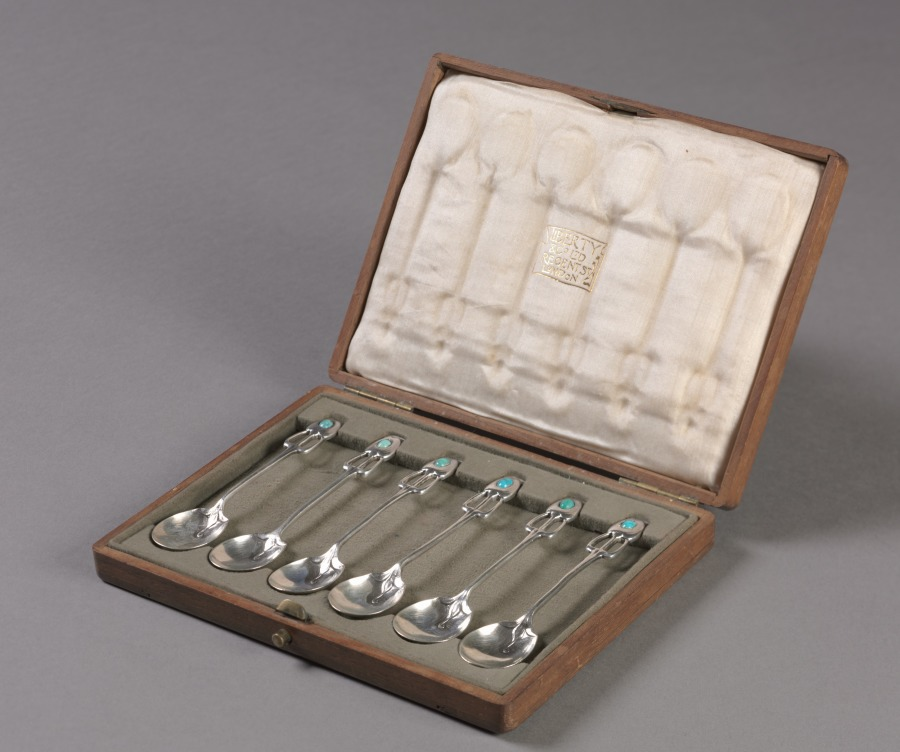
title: Set of six Coffee Spoons in Original Wooden Case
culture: England, London, 19th century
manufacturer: Liberty and Company (British)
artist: attributed to Oliver Baker (British, 1856–1939)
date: 1905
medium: Silver, turquoise, wooden box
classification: Silver